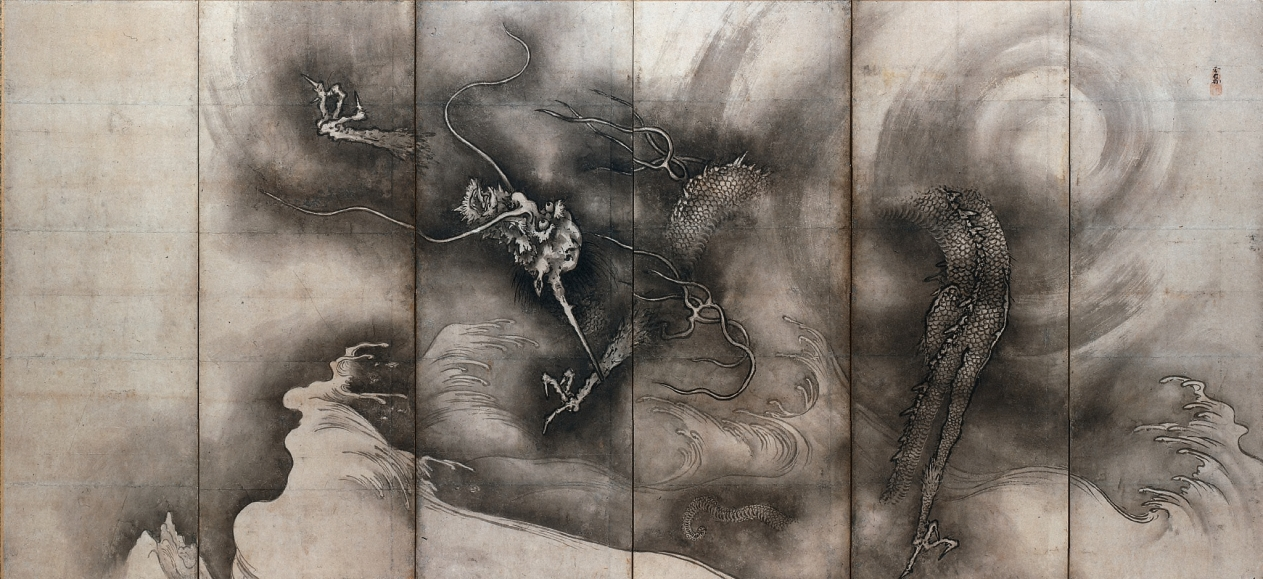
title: Dragon and Tiger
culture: Japan, Muromachi period (1392–1573) to Momoyama period (1573–1615)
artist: Sesson Shūkei (Japanese, c. 1492–c. 1577)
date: c. 1546–56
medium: One of a pair of six-panel folding screens; ink on paper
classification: Painting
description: In Chinese cosmology, dragons produce rain clouds. The dragon disappearing into and reemerging from clouds in this painting seems to generate rough waves in the water below, pulling it toward the sky. The shape of the foreground wave is indirectly sampled from a painting by 13th-century Chinese painter Yujian, a handscroll once owned by the Ashikaga military rulers of Japan. Sesson must have known the famous painting though copies, and made a copy of his own. Here, the wave reinforces the powerful quality of the dragon.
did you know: Sesson's dragon, winding in and out of clouds, may have taken inspiration from Chinese Ming-dynasty works in the style of 13th-century Chinese painter Chen Rong.